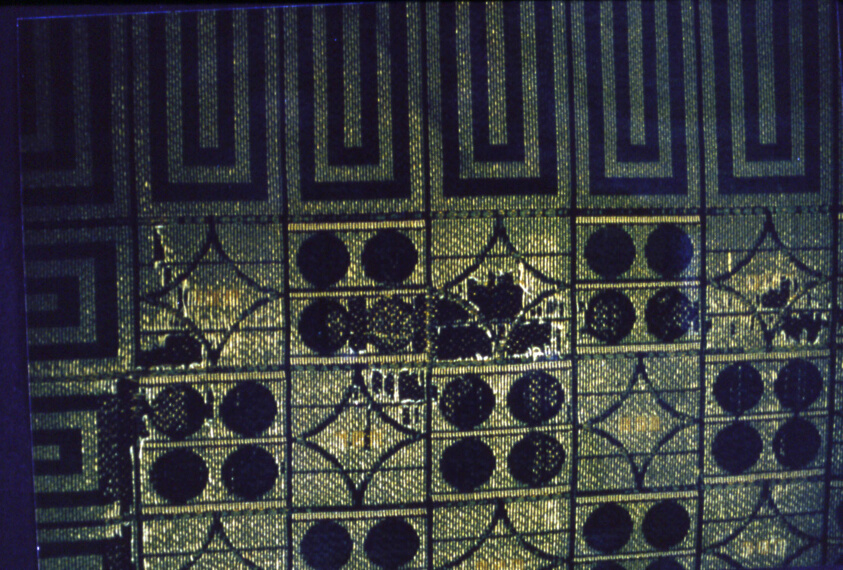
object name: Textile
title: Tablecloth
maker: Produced by Johan Backhausen & Söhne; Austria, Vienna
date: before 1905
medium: Cotton, three-color complementary warp and two-color complementary weft plain weave; edged with cotton and rayon, plain weave with supplementary patterning warps and self-patterning main warp floats; extended weft fringe; woven on loom with Jacquard attachment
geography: Vienna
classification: textile; weaving